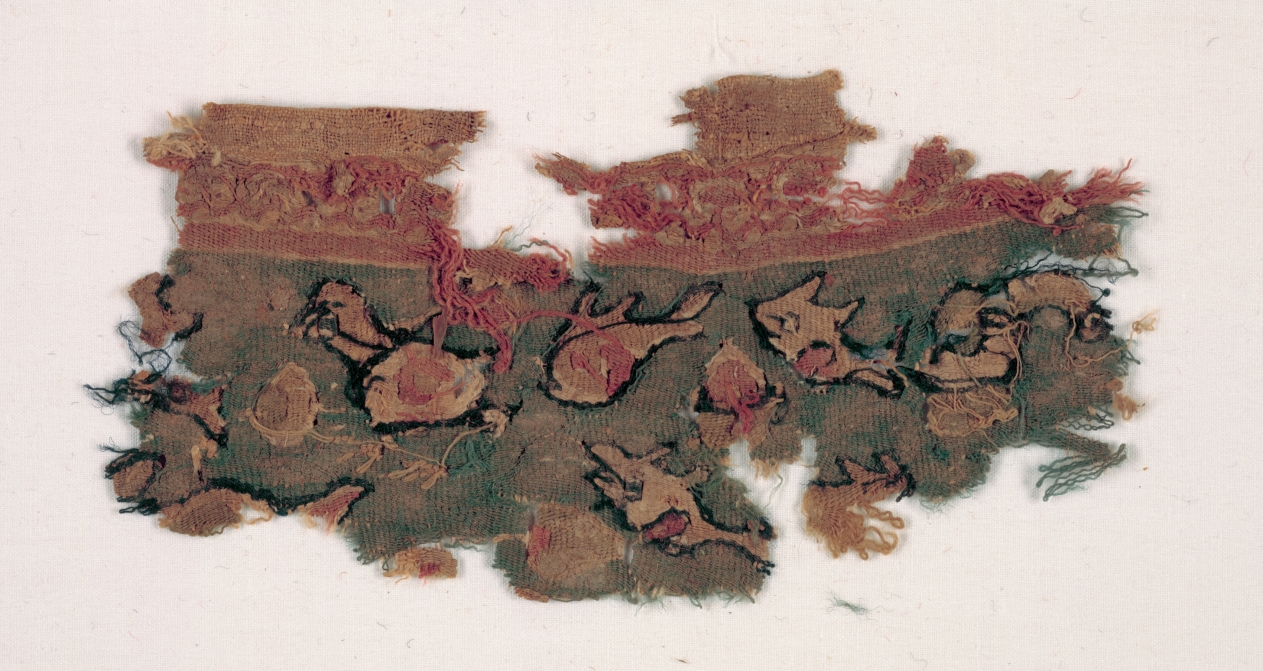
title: Fragment with Fish and Bird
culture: Egypt, Umayyad period (661–750)?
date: 600s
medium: tabby weave with inwoven tapestry ornament, linen and wool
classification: Textile